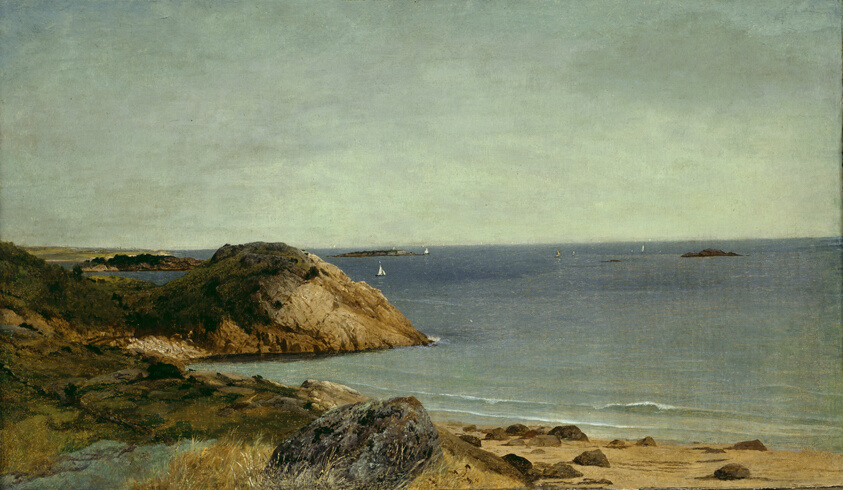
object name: Painting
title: Rocky Coast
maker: John Frederick Kensett (American, 1816–1872)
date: c. 1860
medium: Oil on canvas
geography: United States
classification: painting; american arts